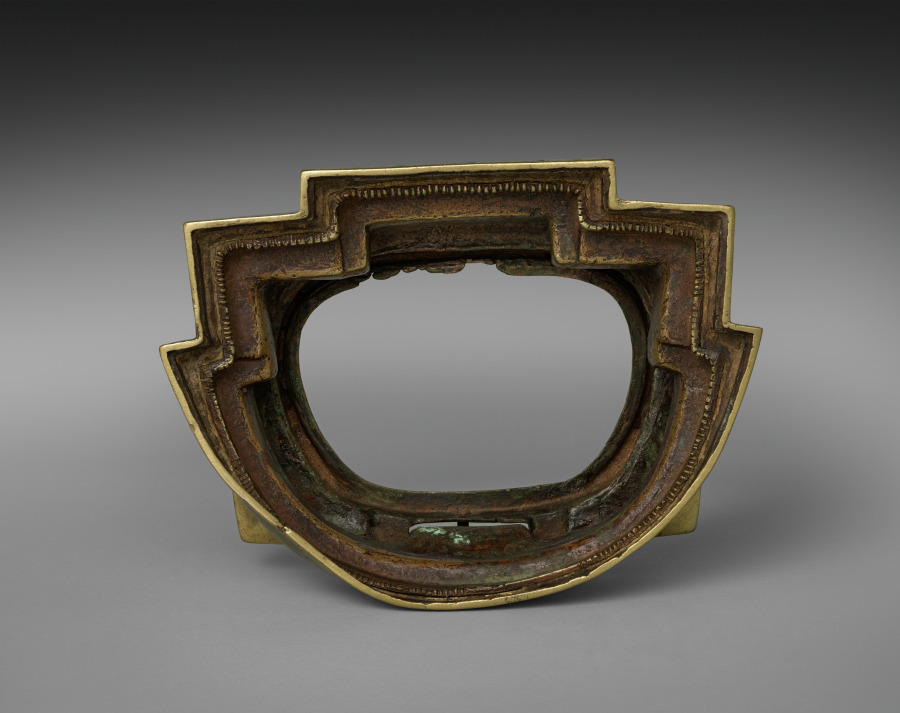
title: Base for Portrait of Phagmo Drupa Dorje Gyalpo (1110–1170)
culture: Central Tibet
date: 1200s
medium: gilt bronze, inlaid with gold, silver, copper, turquoise, lapis and coral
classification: Sculpture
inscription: / / Na mo 'ghu ru / / Ngan lam ban chung bdag gis ni / / bla ma Rin chen sku bzhengs pa yi / / bsod nams 'di yi byin brlabs kyis / / 'gro drug sdug sngal zad par shog / / Translation: "Salutations to the master ! May the sufferings of the six kinds of beings be appeased through the blessing of merit gained by me, the little monk of Ngan.lam, in having this statue of the Lama Rin.chen made."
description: This portrait statue depicts the first monastic leader of the prominent Buddhist monastery of Densatil, an influential early leader of the Tibetan Buddhist monastic order called Kagyu, famous for his views on the importance of meditation. He sits on a lotus pedestal and lion throne, like a Buddha, and his hand positions (mudras) communicate that meditation leads to enlightenment.